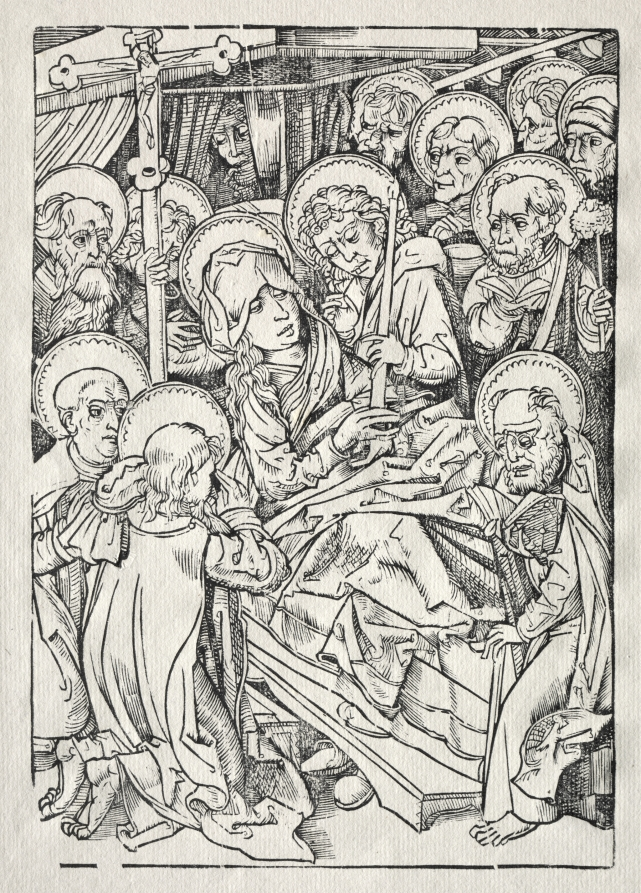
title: Der Tod der Maria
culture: Germany, late 15th-early 16th Century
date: c. 1500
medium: woodcut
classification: Print